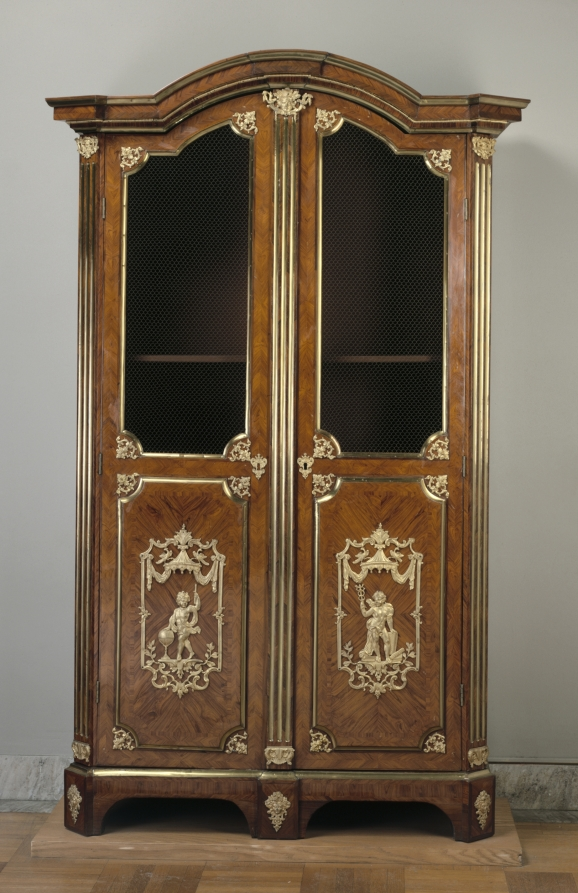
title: Bookcase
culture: France, 18th century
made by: attributed to Charles Cressent (French, 1685–1768)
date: c. 1720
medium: Kingwood and rosewood veneers, gilt metal mounts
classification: Furniture and woodwork